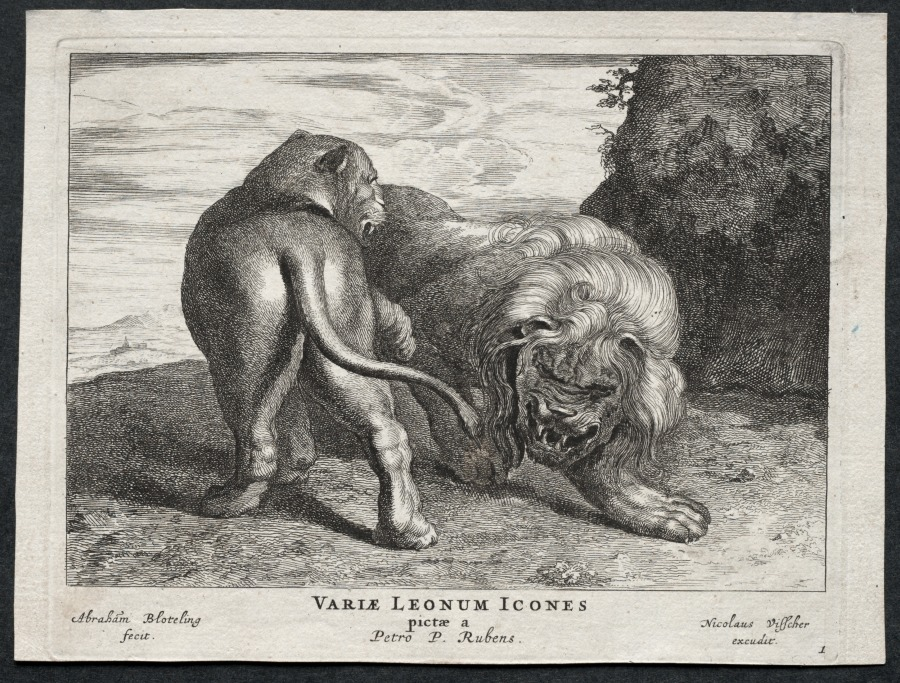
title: Various Lions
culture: Netherlands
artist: Abraham Blooteling (Dutch, 1640–1690)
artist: after Peter Paul Rubens (Flemish, 1577–1640)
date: 1655–90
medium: etching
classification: Print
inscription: Verso: indecipherable collector's stamp (faded due to cleaning)